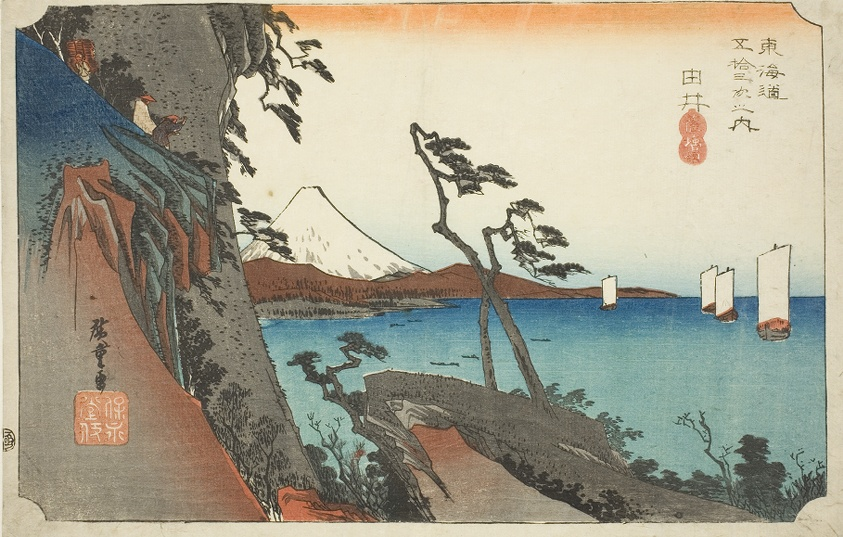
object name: Print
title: Yui: Satta Peak (Yui, Satta mine), from the series "Fifty-three Stations of the Tokaido Road (Tokaido gojusan tsugi no uchi)," also known as the Hoeido Tokaido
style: Japanese (culture or style)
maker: Utagawa Hiroshige 歌川 広重; Japanese, 1797-1858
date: c. 1833/34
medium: Color woodblock print; oban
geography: Japan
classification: woodblock print; print; asian art